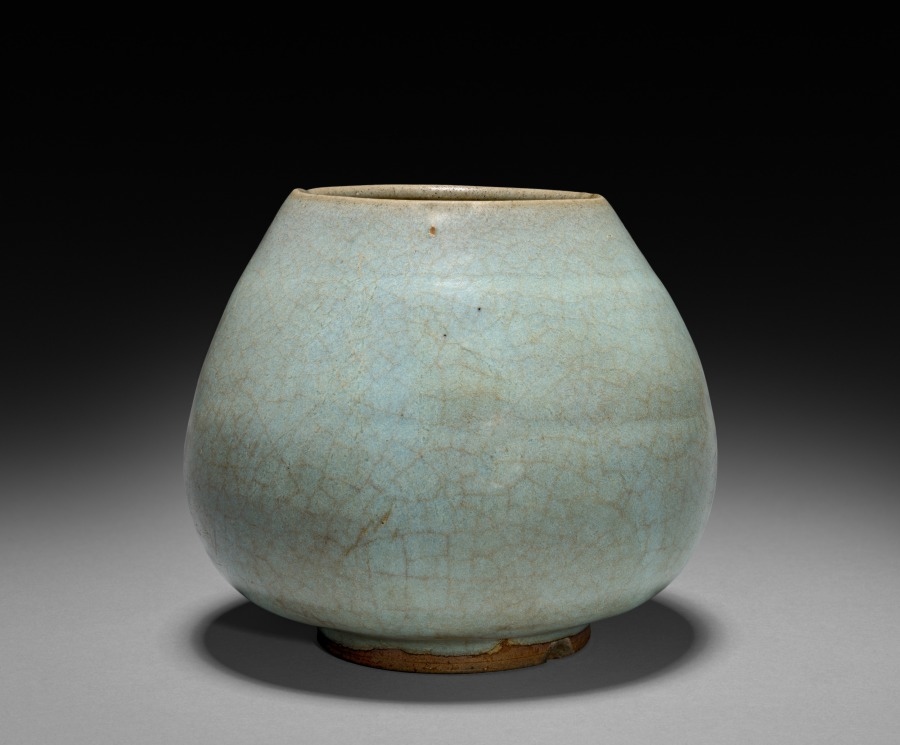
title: Lotus Bud Jar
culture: Northern China, Northern Song dynasty (960-1127) - Jin dynasty (1115-1234)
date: 1100s–1200s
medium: stoneware, Jun ware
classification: Ceramic